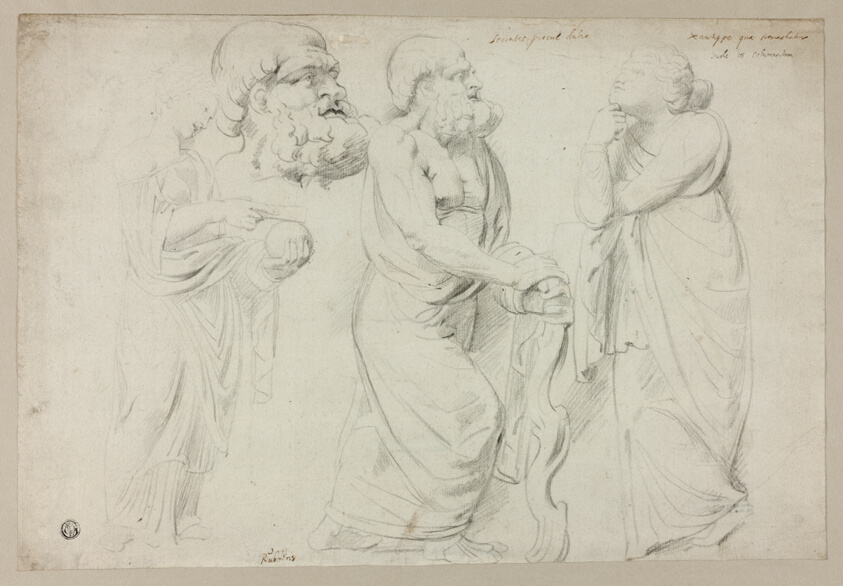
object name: Drawing and Watercolor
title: Studies of a Roman Sarcophagus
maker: Peter Paul Rubens (Flemish, 1577-1640)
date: 1602/03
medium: Black chalk on cream laid paper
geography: Flanders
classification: graphite; drawings (visual works); prints and drawing